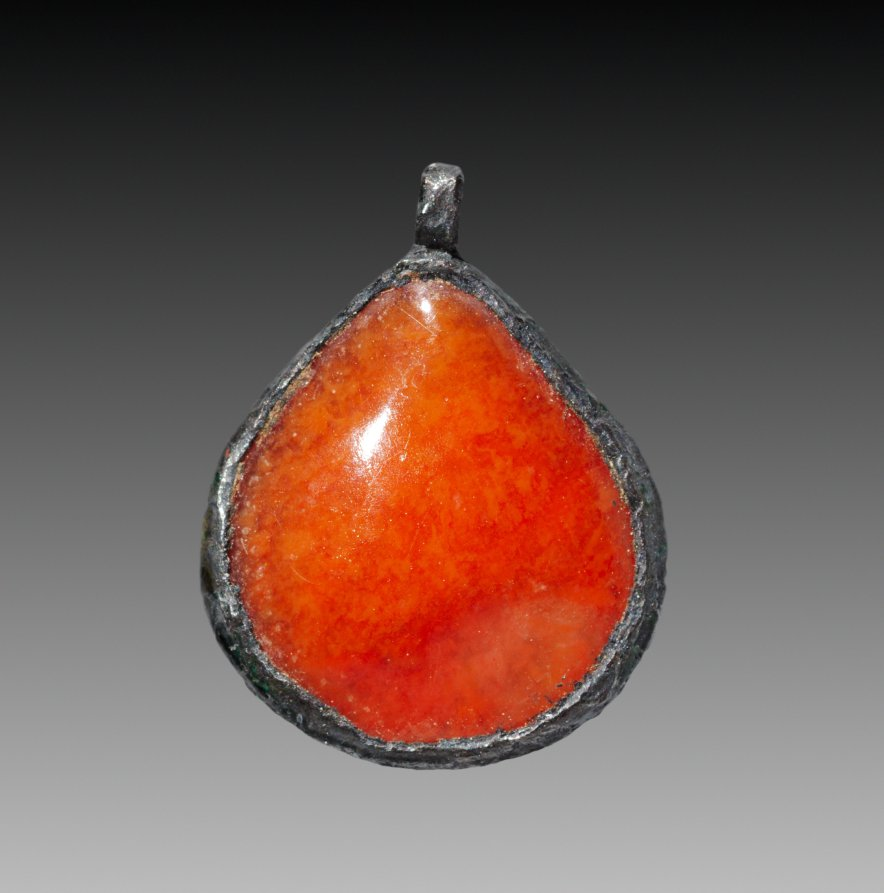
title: Oyster-Shell Pendant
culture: Egypt, Middle Kingdom (2040–1648 BCE), Dynasty 12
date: 1980–1801 BCE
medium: carnelian and silver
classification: Jewelry